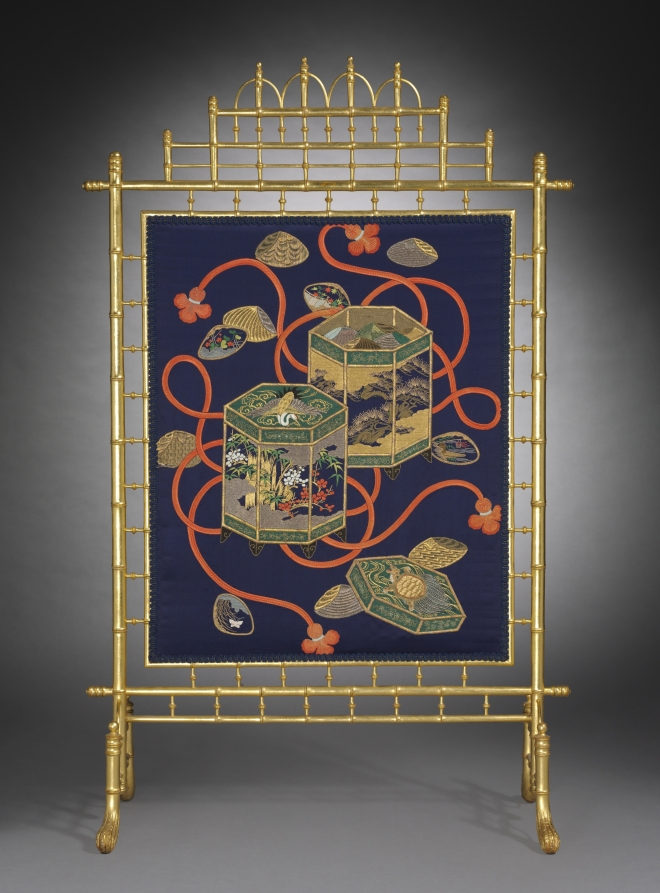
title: Fire Screen with Shell-Matching Game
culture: France, 19th century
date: c. 1870–80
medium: Gilt wood frame with embroidered silk gift cover mounted as a panel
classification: Furniture and woodwork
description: This screen shielded sitters from the heat of a fireplace. The panel incorporates a Japanese cloth gift cover (fukusa), demonstrating the 19th-century fashion in France for Japanese aesthetics. The French frame is carved to resemble bamboo. In Japan, people traditionally draped fukusa over gifts, selecting designs relevant to the occasion. The lids of the hexagonal lacquer game-piece boxes have a crane in clouds and a tortoise in waves, both symbols of longevity. Wedding gift sets often included shell-matching games like the one depicted here. Only the two halves of a specific clamshell can be perfectly matched; game players used the shells’ interior paintings as clues. Games were sometimes painted with episodes from literature, such as the Tale of Genji.